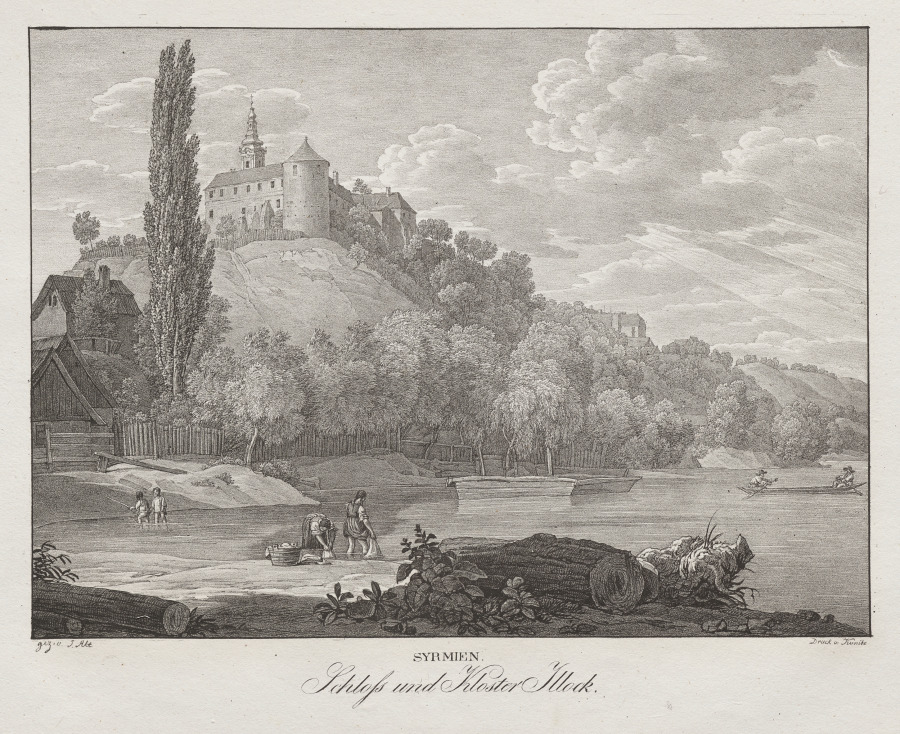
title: Syrmien, Schloss und Kloster Illock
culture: Austria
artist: Jakob Alt (Austrian, 1789–1872)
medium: lithograph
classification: Print